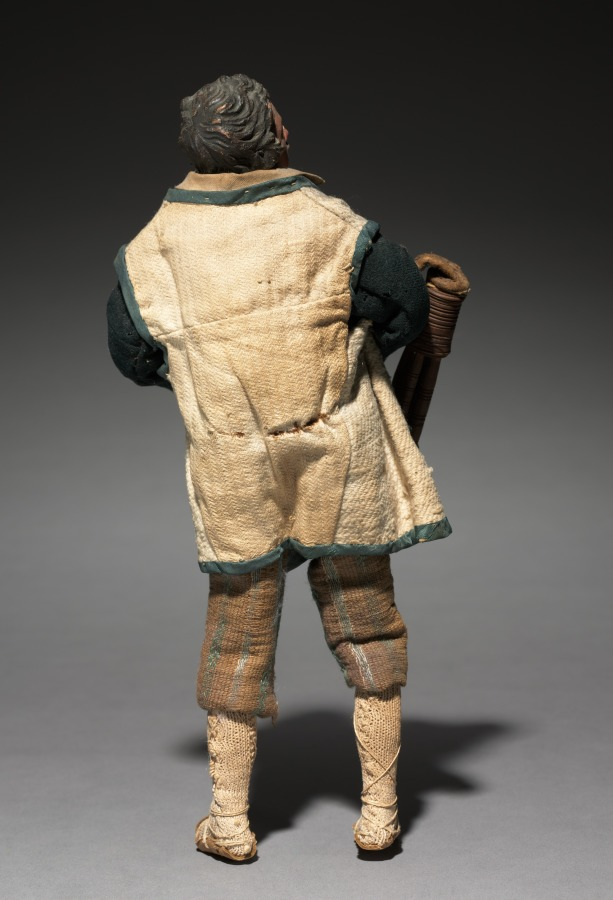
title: Figure from a Crèche: Piper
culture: Italy, Naples, late 18th-early 19th century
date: 1780–1830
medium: painted wood and terracotta with various textiles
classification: Sculpture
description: The practice of creating scenes of the Nativity for the home dates from the early 1700s in Italy, where people began to set up doll-like figures of about a foot or less in height. The custom was particularly popular in Naples around 1800, where crèche scenes (crèche means cradle, or crib) included many figures, whose heads and hands of painted terracotta, stuffed cloth bodies, and clothing adapted from contemporary local costumes gave them an amazingly realistic character. Representations of the birth of Jesus can be traced to the first few centuries of Christianity. Both living creatures and sculptural depictions of them were used from early times. By the late middle ages it was customary to create life-size figures of wood or stone, naturalistically painted, to represent the characters who participated in the events of Jesus's early life. These sculptures were then arranged in scenes illustrating one or both of the most important of these events, the Adoration of the Shepherds and the Adoration of the Magi-the three kings from the East who came to pay homage to the Christ child. Used in churches, these large figures were especially popular in Italy, Central Europe, Spain, and Portugal.